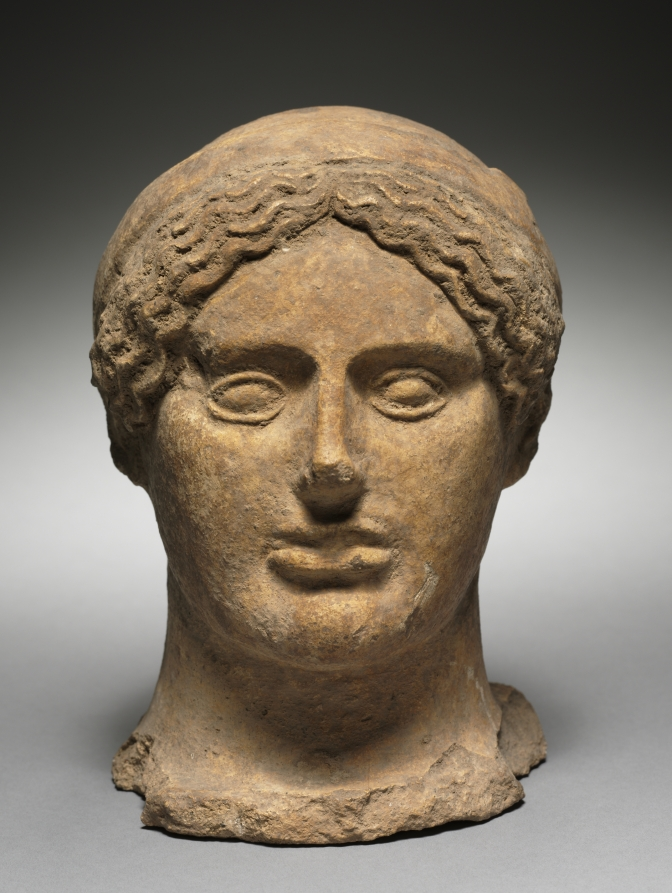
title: Head of a Woman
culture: Etruscan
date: 500–475 BCE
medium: terracotta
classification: Sculpture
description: Probably created for use as a votive dedication, or an offering to a deity, this mold-made female head tops a broad neck spreading into a flat base; no bust or body was intended. The wavy hair, parted in the center, drapes before the ears and beneath a simple headband, framing the face and emphasizing the frontal view. Although three-dimensional, the head is unworked on its back half.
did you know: This sculpture is an example of ancient mass production, as many identical heads could be made from one mold.